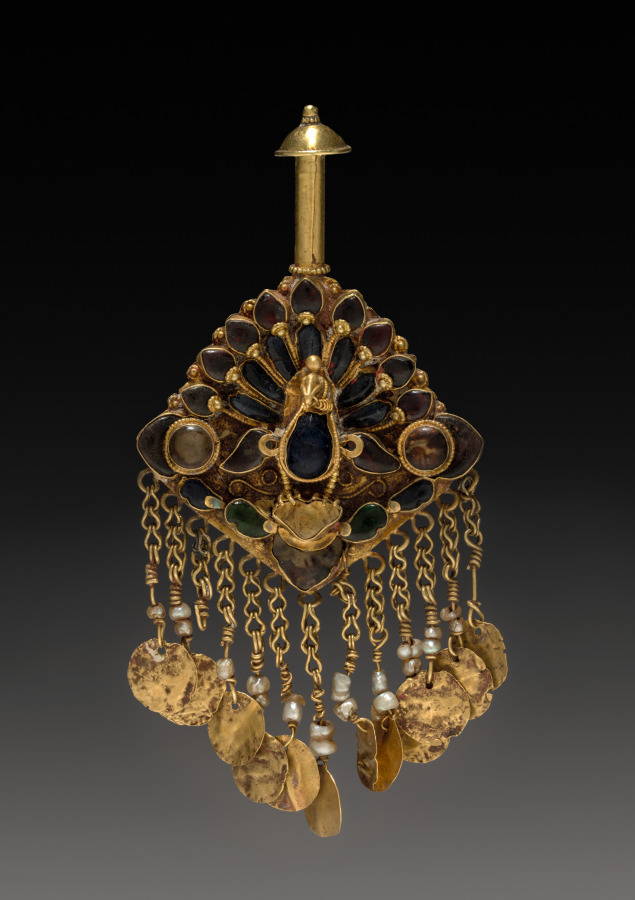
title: Ornament in the Shape of a Peacock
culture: Nepal, Kathmandu Valley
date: 1600s-1700s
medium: gold with jewels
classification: Jewelry